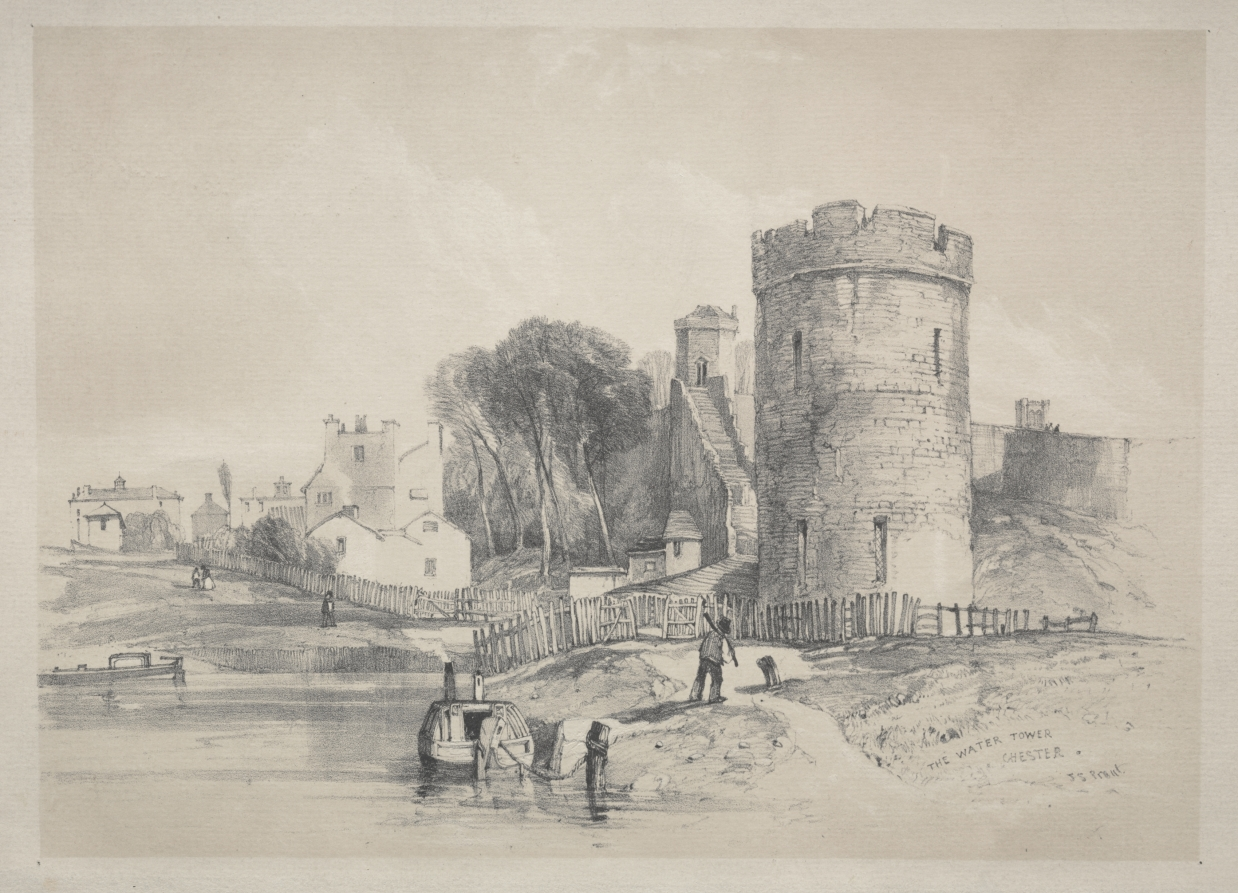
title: The Water Tower, Chester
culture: England, 19th century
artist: John Skinner Prout (British, 1806–1876)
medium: lithograph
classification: Print